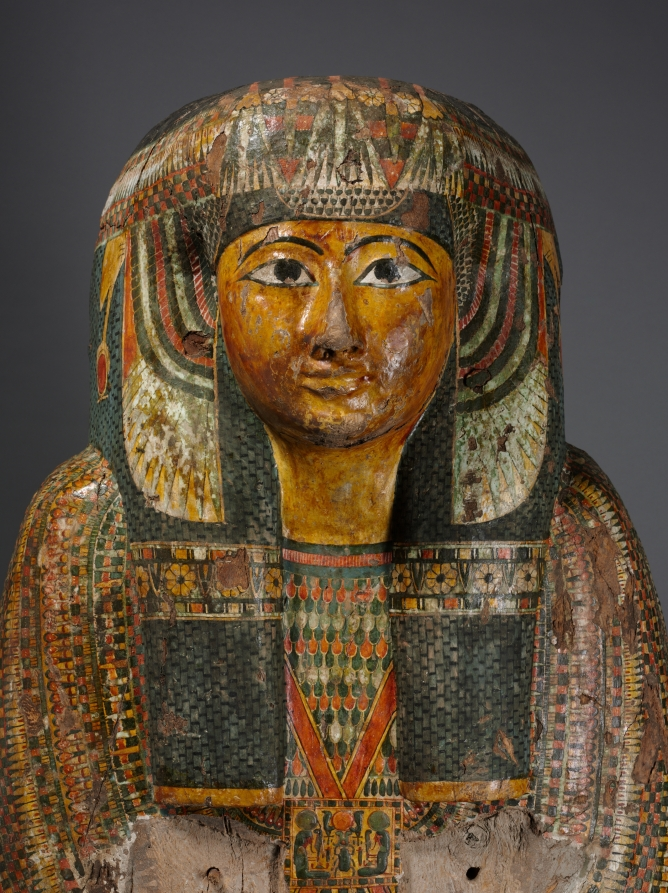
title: Coffin of Nesykhonsu (lid)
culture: Egypt, Third Intermediate (1069–715 BCE), Dynasties 21–22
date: c. 976–889 BCE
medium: gessoed and painted sycamore fig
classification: Funerary Equipment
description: A complete set of coffins during the late New Kingdom and Third Intermediate Period consisted of an outer and inner coffin and a mummy board (essentially a lid without a case, placed directly over the wrapped mummy). Judging by its size, this must have been Nesykhonsu's outer coffin. The type is essentially the same as the coffin of Bakenmut, which was also an outer coffin. The two coffins are said to have been found together and to have belonged to a man and wife. This is quite possible, although the inscriptions do not bear it out. Bakenmut is not mentioned on Nesykhonsu's coffin, nor is she mentioned on his. There was by this time a tremendous repertoire of scenes appropriate for coffin decoration. Whereas Bakenmut's coffin features images of deified dead pharaohs, Nesykhonsu's is decorated in a more personal way with scenes from her own funeral. The main scene in the interior (near the top) shows a priest clad in a panther skin with the mummy of Nesykhonsu behind. The god appears in mummy form and wears a sun disk on his head. The scarab beetle inside the sun disk identifies him as Khepri, the morning sun, and the hieroglyphs to the right identify him as Atum, the evening sun. Taken together, image and text represent the sun god in both his rising and setting, youthful and aged aspects.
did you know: Two of Nesykhonsu's titles, "Lady of the House" and "Singer of the Choir of Mut the Great," are written on the outside of the coffin.